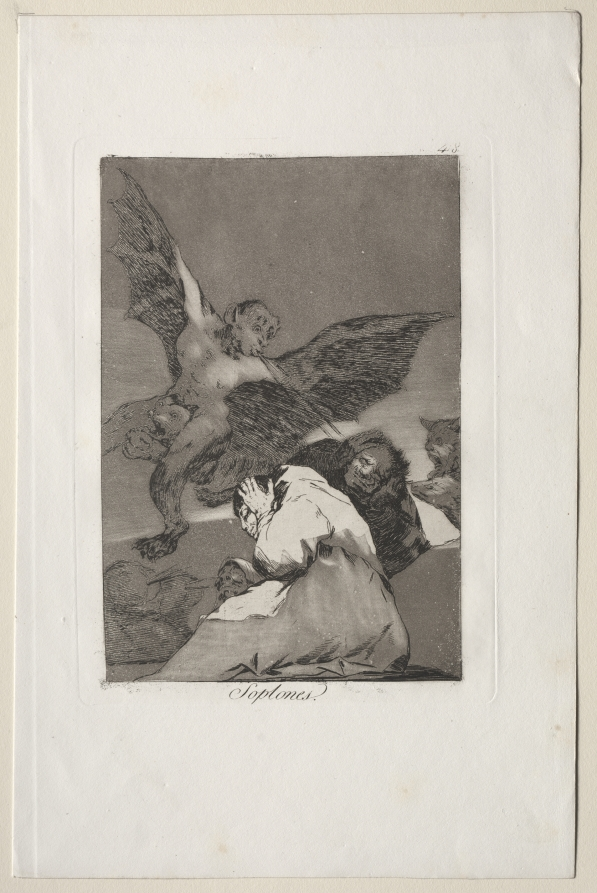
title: Tale-Bearers--Blasts of Wind, Plate 48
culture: Spain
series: Los Caprichos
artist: Francisco de Goya (Spanish, 1746–1828)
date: 1799, printed c. 1855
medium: etching and aquatint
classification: Print